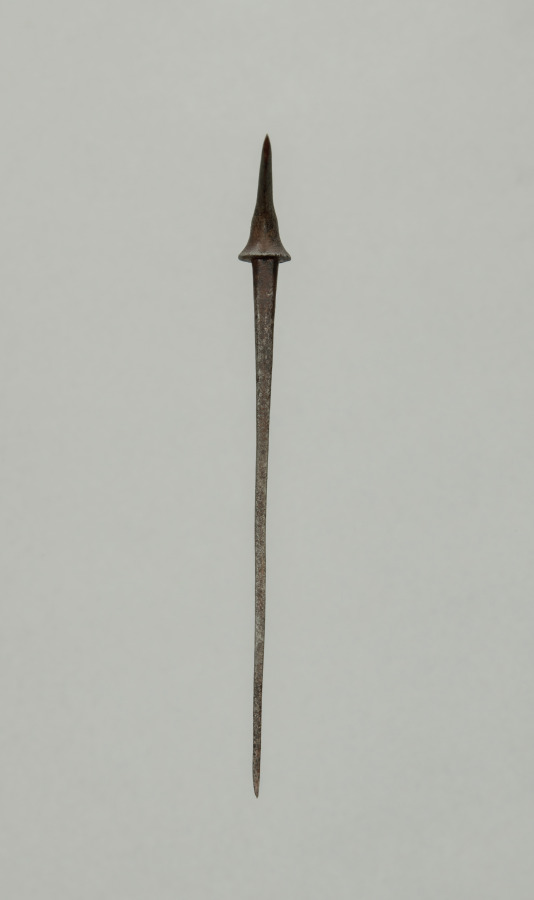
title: Arrow Point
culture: Japan, Edo period (1615–1868)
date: 1700s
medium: steel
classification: Arms and Armor